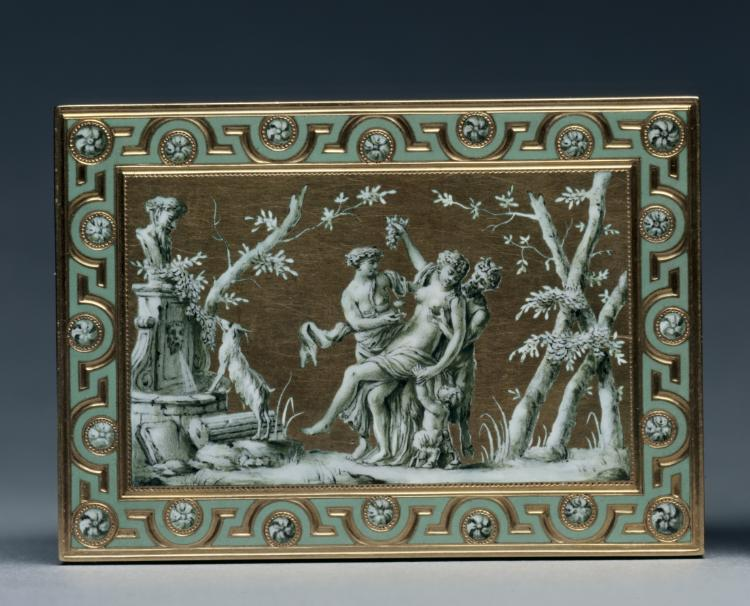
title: Box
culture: France, 18th century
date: c. 1768–1769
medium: gold and enamel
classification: Enamel